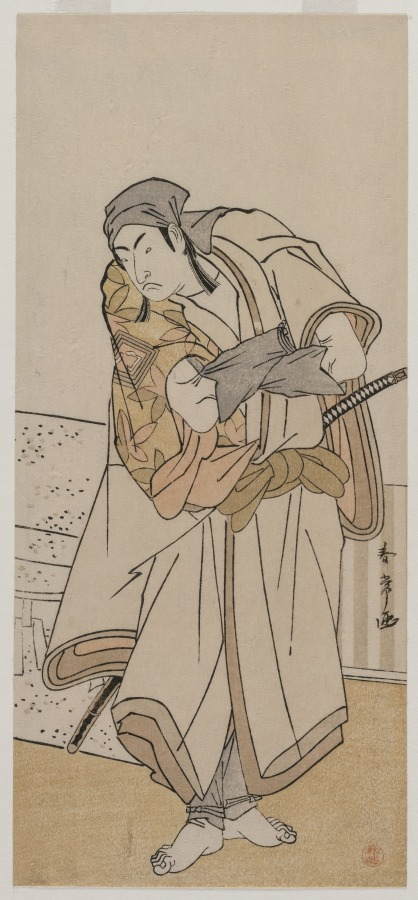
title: Ichikawa Monnosuke II Standing Beside a Stone Box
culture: Japan, Edo period (1615–1868)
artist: Katsukawa Shunjō (Japanese, d. 1787)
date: c. 1780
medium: color woodblock print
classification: Print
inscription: Signature: Shunjo ga